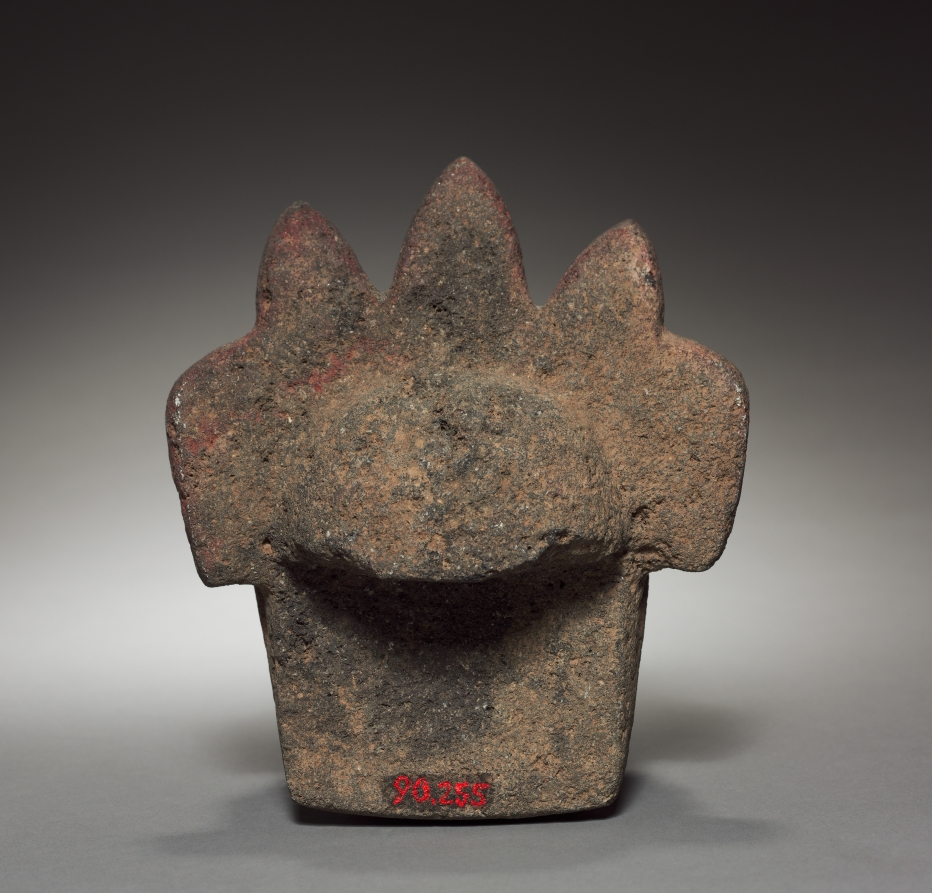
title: Head Hacha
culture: Mexico, Veracruz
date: 300–900 CE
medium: gray volcanic stone with red pigment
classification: Sculpture